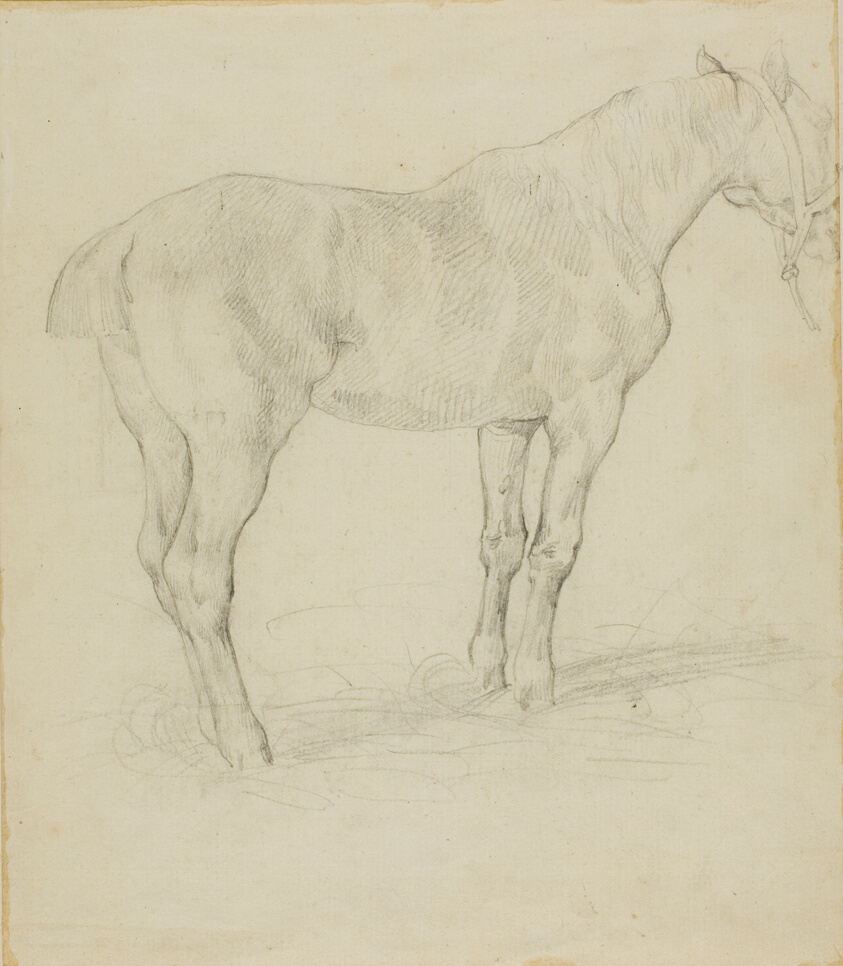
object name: Drawing and Watercolor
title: Standing Horse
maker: Jean Louis André Théodore Géricault (French, 1791-1824)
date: 1818/19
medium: Graphite, on cream laid paper, perimeter mounted on cream wove paper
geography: France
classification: graphite; drawings (visual works); prints and drawing